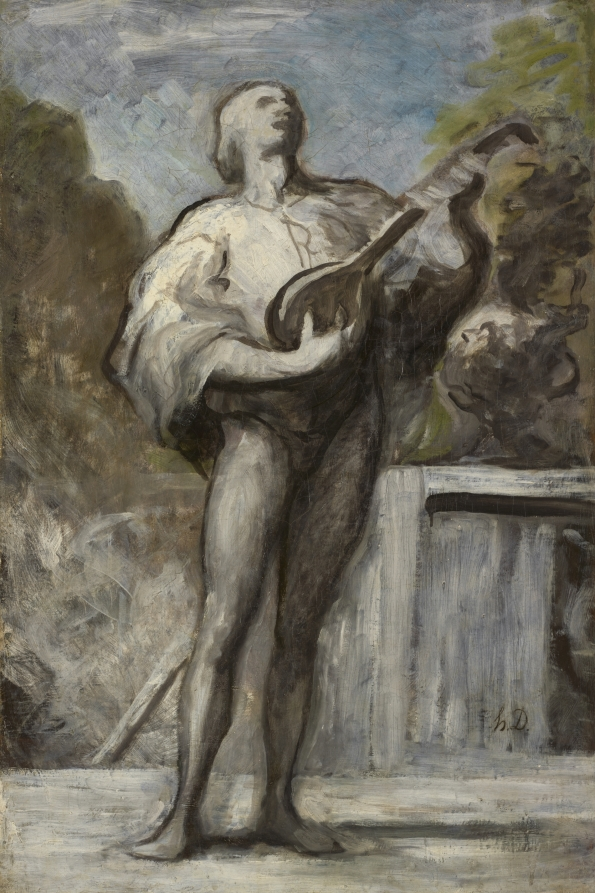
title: The Troubadour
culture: France, 19th century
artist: Honoré Daumier (French, 1808–1879)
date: 1868–73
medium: oil on fabric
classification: Painting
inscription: Signed in lower right: h.D. [reinforced]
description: The troubadour, a medieval traveling poet and entertainer, was a popular subject in 19th-century French art. Associated with chivalry and courtly love, the theme reflects a broader, romantic fascination with France's medieval past. Although Daumier was particularly inspired by the troubadour paintings of French Rococo artist Jean-Antoine Watteau of the 1700s, he rendered the subject here in a powerful style of simplified, muscular form that appealed to modern artists of his own time.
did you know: Daumier was called the “Michelangelo of caricature” and especially renowned for his cartoons and drawings satirizing 19th-century French politics and society.